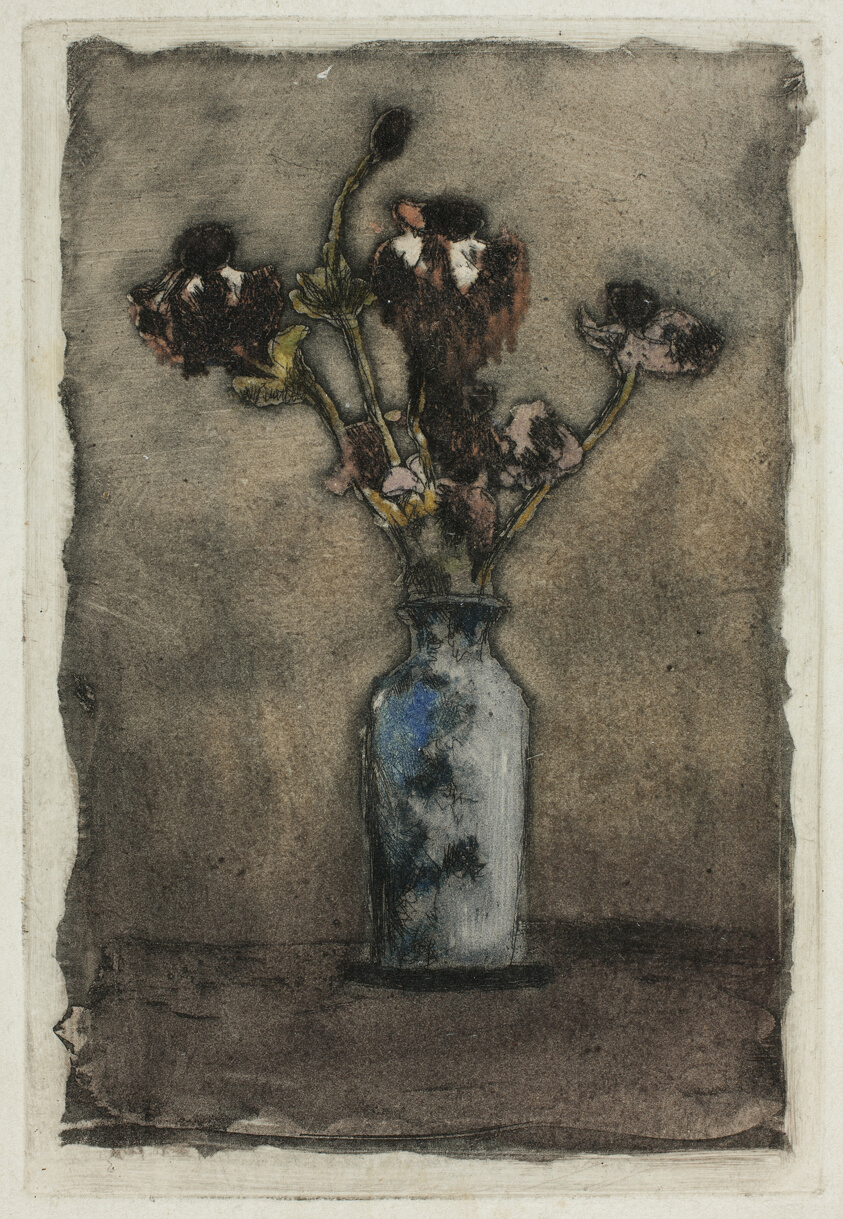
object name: Print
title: Anemonies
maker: Theodore Roussel (French, worked in England, 1847-1926)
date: 1897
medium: Color etching and aquatint on ivory laid paper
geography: England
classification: etching; aquatint; paper; print; prints and drawing